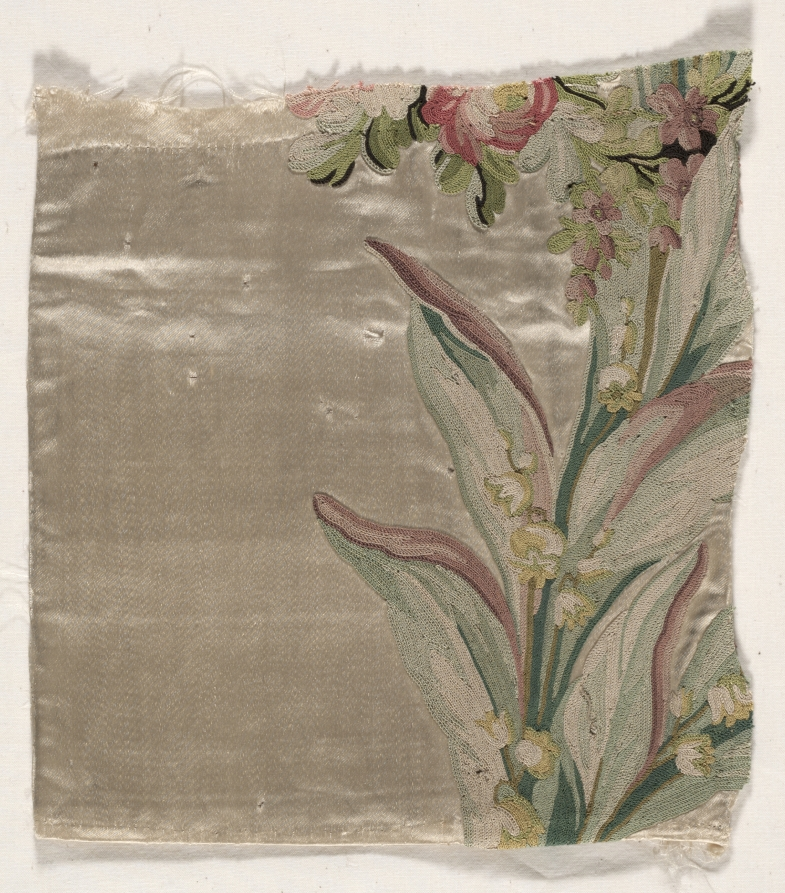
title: Coverlet Fragment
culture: France, 18th Century, period of Louis XVI (1774-1793)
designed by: Philippe de Lasalle (French, 1723–1805)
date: c. 1760–1770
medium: embroidered satin and silk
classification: Textile